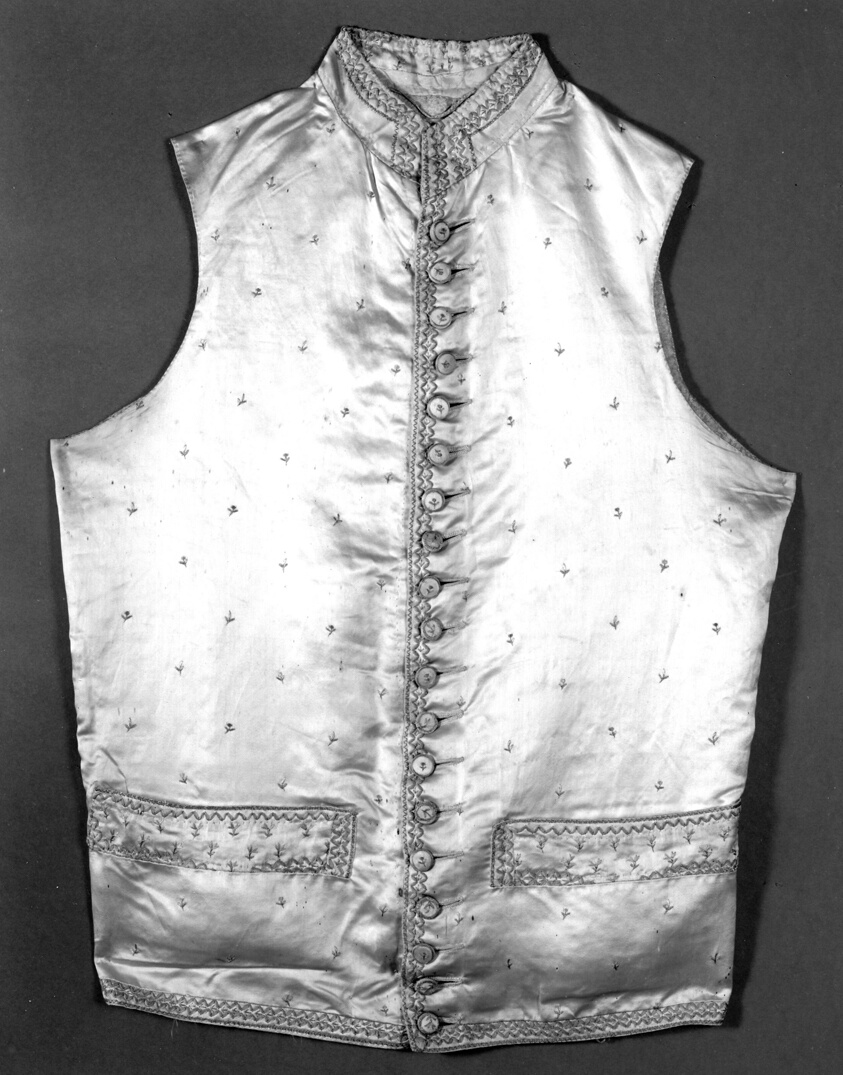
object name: Costume and Accessories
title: Waistcoat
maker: France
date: 19th century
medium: Silk, satin weave; embroidered with silk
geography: France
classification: textile; costume; needlework (visual works); dress (garment); clothing